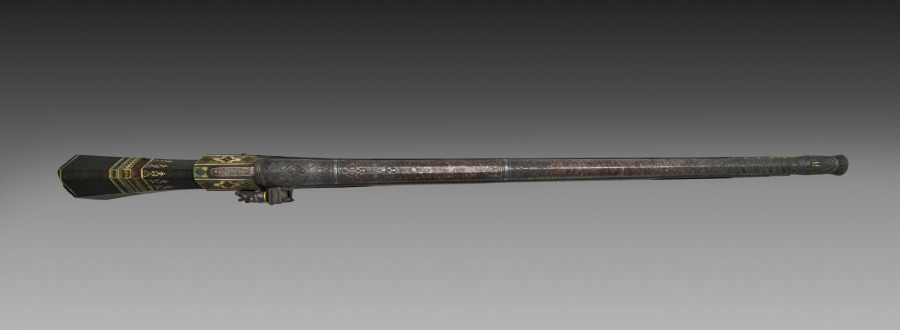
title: Gun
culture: India, Rajput Kypi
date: c. 1800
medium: iron with bone and silver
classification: Arms and Armor